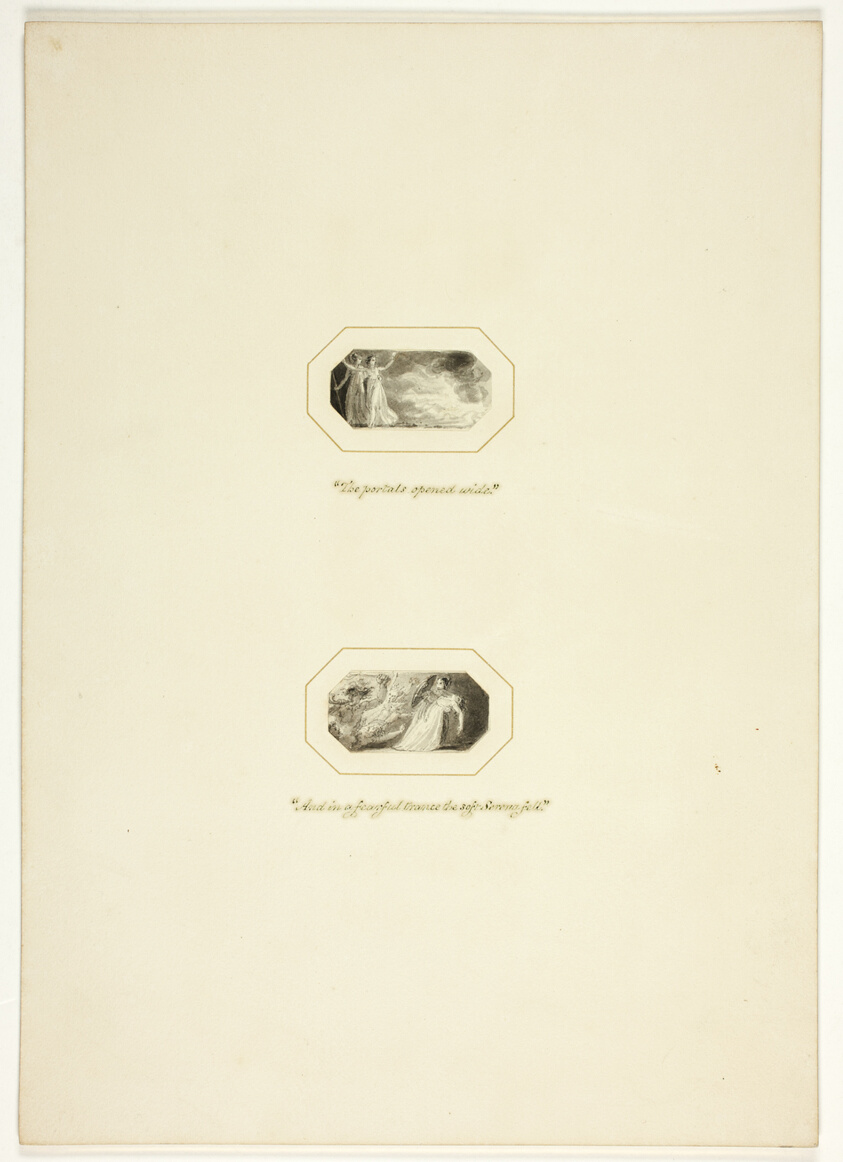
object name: Drawing and Watercolor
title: Study for a plate from The Triumphs of Temper, in the 1796 Royal Engagements Pocket Book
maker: Thomas Stothard (English, 1755-1834)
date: c. 1795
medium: Ink wash on paper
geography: England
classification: ink or chalk wash; drawings (visual works); prints and drawing